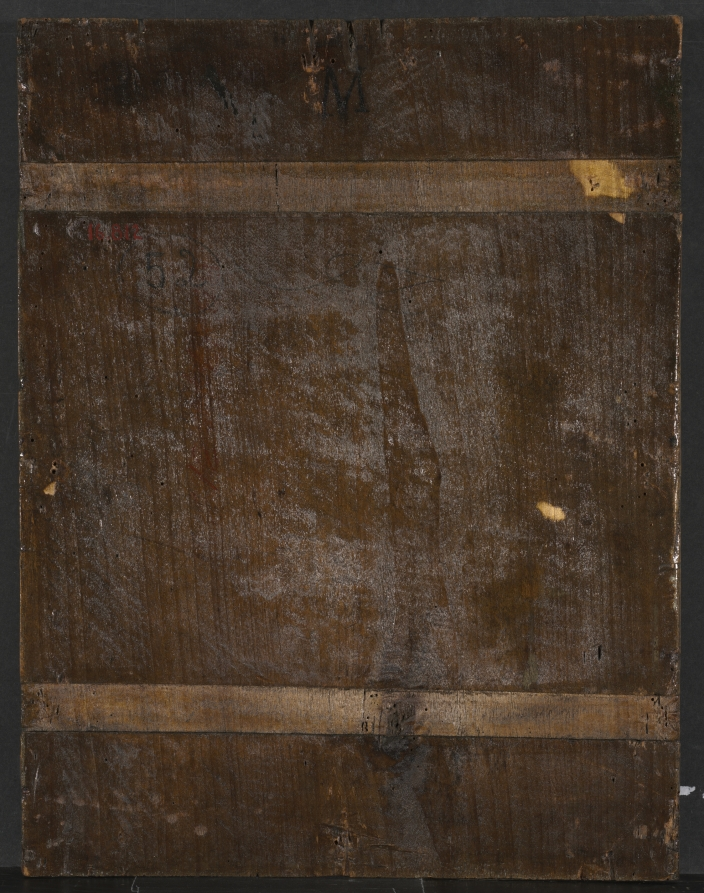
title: Virgin and Child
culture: Italy, Milan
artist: attributed to Bernardino Luini (Italian, c. 1480-c. 1532)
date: 1500s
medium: oil on wood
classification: Painting